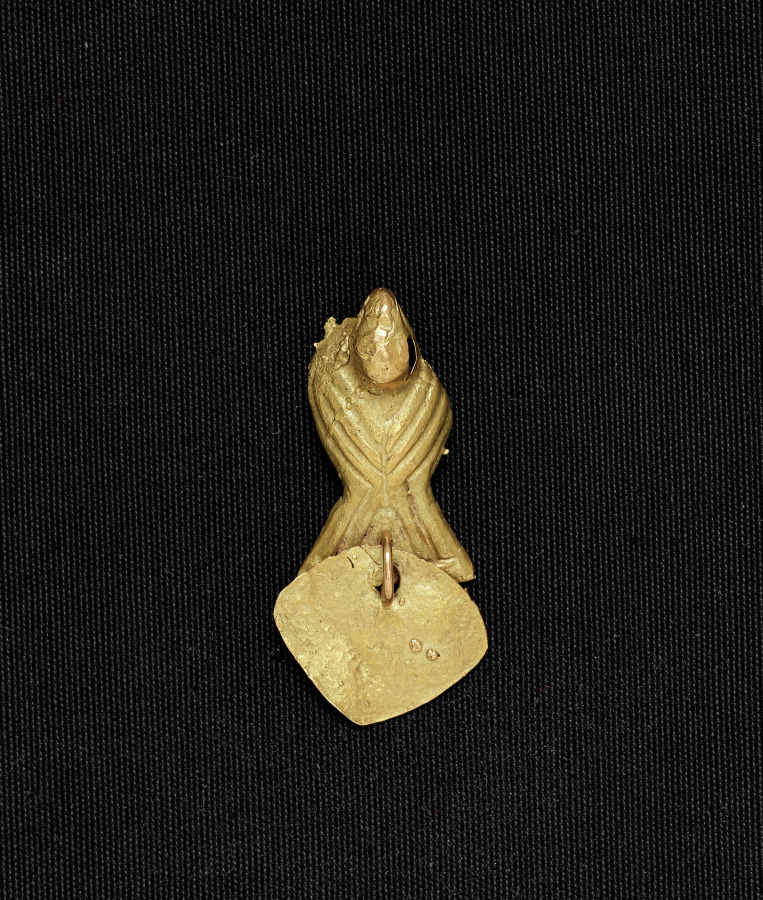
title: Bird Bead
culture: Colombia, Muisca style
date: c. 900–1550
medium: cast gold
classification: Jewelry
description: Muisca metalwork divides into two categories: ornaments to be worn, such as these, and offering figurines, in the case to the right. The elaborate bird pendant features delicate herringbone moldings, openwork patterns, and wing details-all part of the wax model from which the pendant was cast (see nearby computer animation). The dangles were attached after casting.